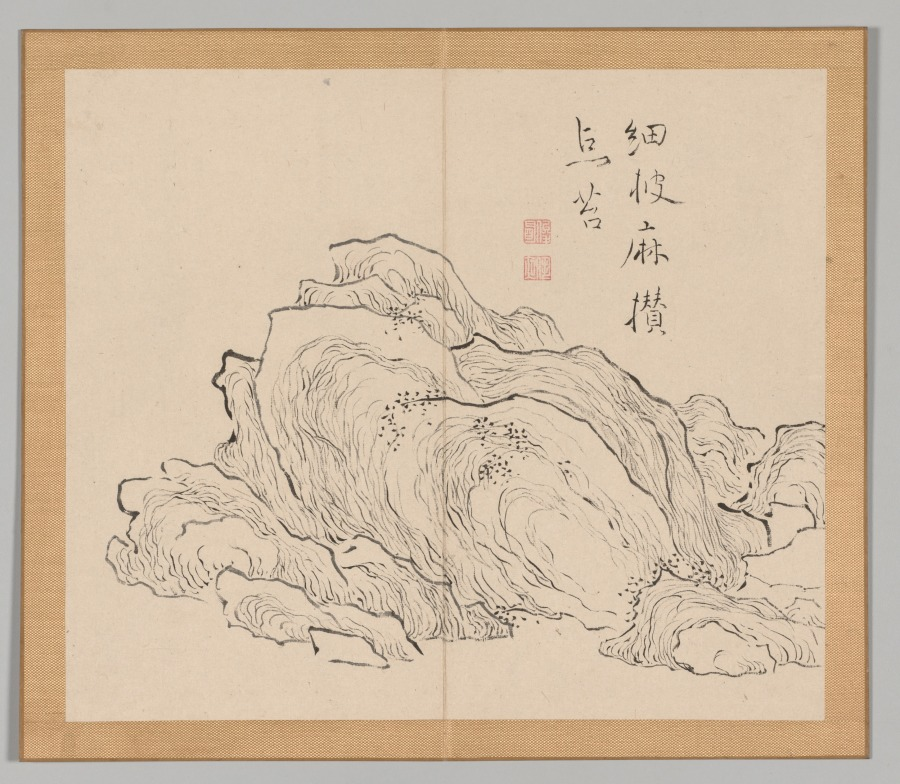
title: Reverberations of Taiga, Volume 1 (leaf 13)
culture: Japan, Edo period (1615–1868)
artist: Aoki Shukuya (Japanese, d. 1802)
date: mid- to late 1700s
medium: double-leaf from a pair of albums; ink and light color on paper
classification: Portfolio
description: Traditionally, young painters in Japan began their studies with an established master-painter. The master's compositions invariably became models that the apprentice copied to learn various ink and brush techniques. Shukuya was a pupil of the famous Kyoto artist Ikeno Taiga, whose style is reflected in these sketches of rocks, trees, and mountains.